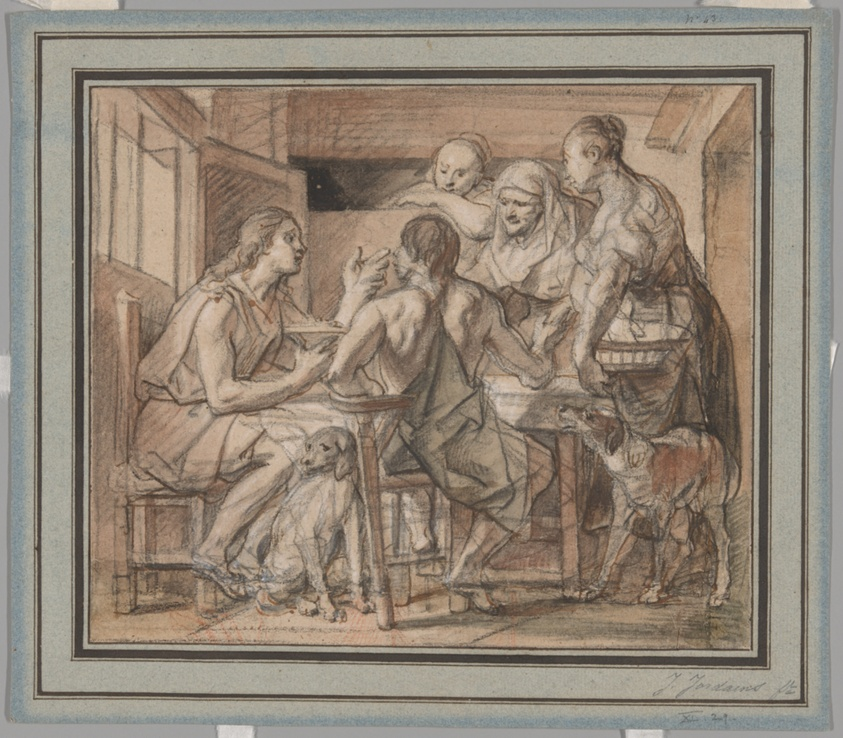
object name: Drawing and Watercolor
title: Jacob and Esau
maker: Jacob Jordaens (Flemish, 1593-1678)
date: c. 1655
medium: Charcoal, pen and brown ink, and brush and brown washes, heightened with opaque white watercolor, on pieced cream laid paper, laid down on blue laid paper, ruled in pen and brown ink, laid down on tan laid paper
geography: Flanders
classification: charcoal; paper; prints and drawing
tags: dogs, animals